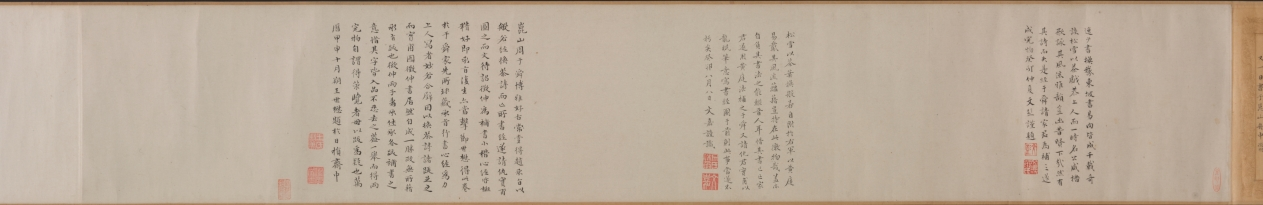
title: Zhao Mengfu Writing the Heart (Hridaya) Sutra in Exchange for Tea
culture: China, Ming dynasty (1368–1644)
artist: Qiu Ying (Chinese, 1494–1552)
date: 1542–43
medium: handscroll, ink and light color on paper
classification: Painting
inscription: Inscription accompanying text of "Heart" sutra, by Wen Zhengming 文徵明 (1470-1559): Zhengming 徵明, written in a boat at Kunshan 崑山, on the twenty-first day of the ninth month, in the renyin 壬寅 year, the twenty-first year of the Jiajing era [1542].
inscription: Colophon by Wang Shih-mou: Chou Yü-shün [Feng-lai] of K'un-shan was a scholarly, refined connoisseur of antiquities. He had acquired the poem written by Chao Ch'eng-chih [Chao Meng-fu] about the exchage of tea for Chao's calligraphy of the Prajna sutra. But the sutra itself, also written by Chao Meng-fu, is lost. He therefore asked Ch'iu Shih-fu [Ch'iu Ying] to do a painting and had Wen Cheng-ming, the artist-in-attendance, write the Hridaya Sutra in the "small, regular" style for replacement. Both works are so excellent that even Chao Meng-fu himself would certainly applaud if he should be reborn to see them. I, Shih-mou, had gotten possession of this scroll from the family of Chou Yü-shün, and since it was so wonderfully matched with one of the treasures in my collection. the Hridaya Sutra written by Chao Meng-fu for Priest Li in "running script," like the reuniting of two halves of a jade pi, I completed the scroll with the several colophons written for the "tea-exchange" poem. I did this because the painting of Ch'iu Ying and the calligraphy of Wen Cheng-ming are definitely masterpieces by themselves with absolutely no need to depend on any of the colophons written for the Chao Meng-fu poem. Furthermore, the two sons of Wen Cheng-ming, Shou-ch'eng [Wen P'eng] and Hsiu-ch'eng [Wen Chia]. have each written a colophon explaining the reason for replacing the calligraphy. As their writings are both acceptable for high standard, I didn't want to throw them away. [So by separating these into two scrolls] I was able to get two complete works of art in one clever stroke. I was quite pleased with myself, and hope that those who see this scroll shall not get suspicious because of the missing colophons. Wang Shih-mou wrote in his Jih-sun-chai study, on the first day of the tenth month, in the chia-shen year of the Wan-li era [1584].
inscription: Colophon by Wen P'eng: I-shao [Wang Hsi-chi] wrote in exchange for a flock of geese. Su Tung-po wrote in exchange for meat. Both episodes have become legends of a thousand years. Sung-hsüeh [Chao Meng-fu] "teased" Priest Kung for tea, and the story was immediately immortalized in the poems by all the famous scholars of the times. Indeed, how could one say his humor and elegance are not equal to the ancient worthies? Unfortunately, the poetry has survived but the writing of the sutra is lost. Yü-shün [Chou Feng-lai] therefore asked my father to make up the writing and so here is the complete work of art. Respectfully inscribed by Wen P'eng in the mid-summer of 1543.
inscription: Colophon by Wen Chia: Sung-hsüeh [Chao Meng-fu], in exchanging tea leaves for his writing of the Prajna, had put himself in the company of Yu-chün [Wang Hsi-chih] who exchanged geese for his writing of the Huang-t'ing sutra [the Yellow Chamber, or the Wai-ching ching, a Taoist text attributed to the Yellow Emperor]. However, was this romantic and cultivated gesture really intended for such small things? Actually, he was only proud that the excellence of his calligraphy had made him worthy to be the successor of the Ch'in Dynasty master. Since, very unfortunately, Chao Meng-fu's writing [of the Prajna] was already lost, my father therefore agreed to replace it, and did the calligraphy in the style of the Yellow Chamber. In addition, Yu-shün [Chou Feng-lai] had asked Mr. Ch'iu Shih-fu [Ch'iu Ying] to do a painting of the sutra writing story in the style of Li Lung-mien at the head of the scroll. Now it would seem the entire episode should go down in history for immortality. Respectfully recorded by Wen Chia, on the eighth day of the eighth month, in the year of k'uei-mao [1543]. trans. WKH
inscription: 4 colophons and 23 seals: 1 colophon, dated 1543, and 2 seals of Wen Peng (1498-1573); 1 colophon, dated 1543, and 2 seals of Wen Chia (1501-1583); 1 colophon, dated 1584, and 3 seals of Wang Shih-mou (1536-1588); 2 seals of Chou Feng-lai (16th c.); 3 seals of Sung Lo (1634-1713); 5 seals of the Ch'ien-lung emperor (r. 1736-95); 1 colophon, dated 1902, and 1 seal of Fei Nien-tz'u (1885-1905); 4 seals of Wan-go H. C. Weng (b. 1918); 1 seal unidentified.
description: The Yuan dynasty calligrapher Zhao Mengfu (1254–1322) is said to have transcribed the Heart Sutra for a certain priest named Li in exchange for tea. Later, during the Ming dynasty, the professional painter Qiu Ying from Suzhou painted this scene for his patron. Here, Zhao Mengfu holds a brush and has a piece of paper laid out before him. On the table is an ink stone, an ink stick, and a small water dropper. Drops of water would dissolve the ink stick into liquid ink when it was ground on the flat square stone.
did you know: Qiu Ying was born to a peasant family, but his natural talent led him to a successful career as a professional painter with wealthy patrons.